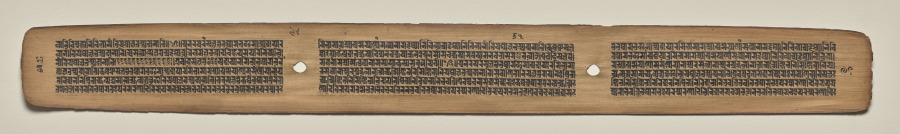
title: Text, Folio 94 (verso), from a Manuscript of the Perfection of Wisdom in Eight Thousand Lines (Ashtasahasrika Prajnaparamita-sutra)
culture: Eastern India, Bihar, Vikramashila Monastery. Painting: Nepal, Kathmandu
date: Sunday, September 14, 1119 (year 239 of the Newar Samvat in the month of Ashvina)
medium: gum tempera and ink on palm leaves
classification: Painting